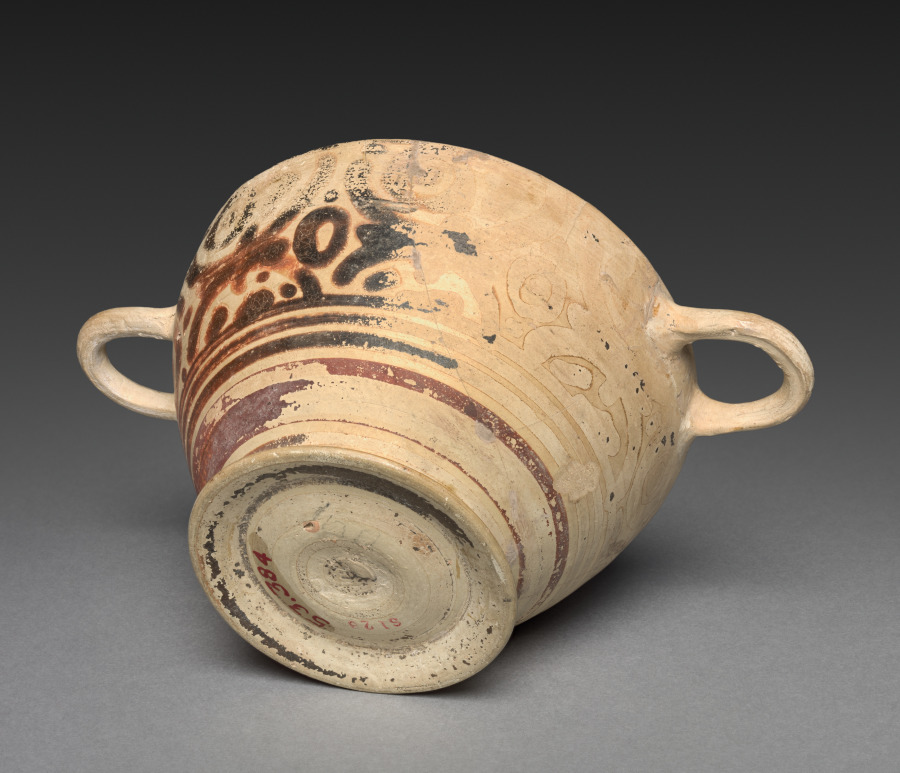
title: Black-Figure Kotyle (Drinking Cup)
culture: Greek, Corinthian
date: 500s BCE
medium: ceramic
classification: Ceramic